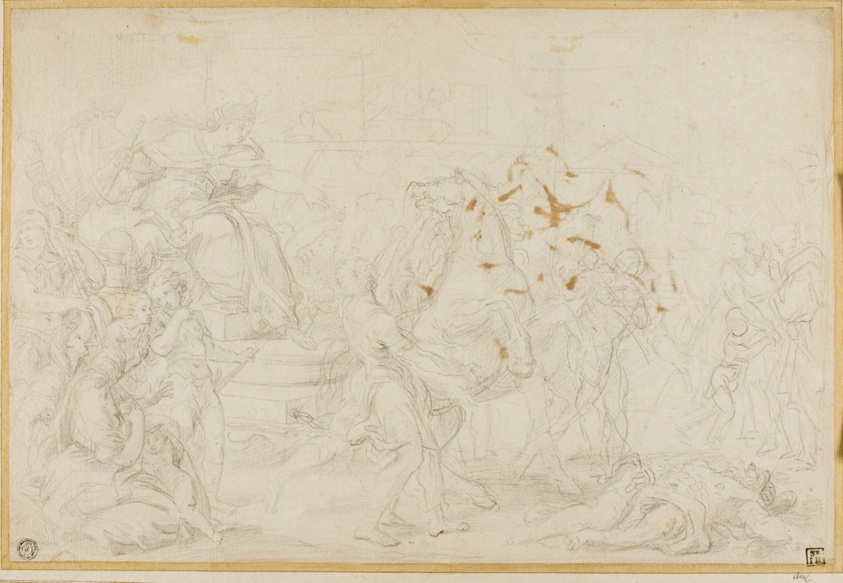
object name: Drawing and Watercolor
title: Study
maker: Attributed to Giuseppe Bartolomeo Chiari (Italian, 1654-1727); or possibly Giacinto Calandrucci (Italian, 1646-1707); or possibly Pietro da Cortona (Italian, 1596-1669)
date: c. 1686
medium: Black chalk, on ivory laid paper, laid down on cream wove paper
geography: Italy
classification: graphite; drawings (visual works); prints and drawing